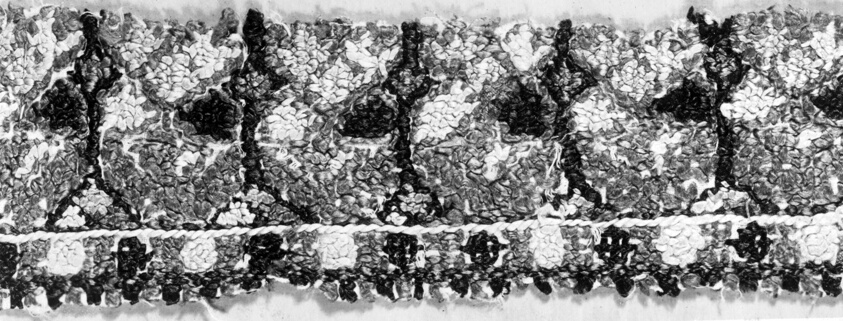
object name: Textile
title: Fragment (Border)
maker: Morocco, Meknès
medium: Silk embroidery on cream-colored cotton voile. Stitch: Holbein-stitch, stem-stitch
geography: Morocco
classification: textile; needlework (visual works); weaving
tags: morocco